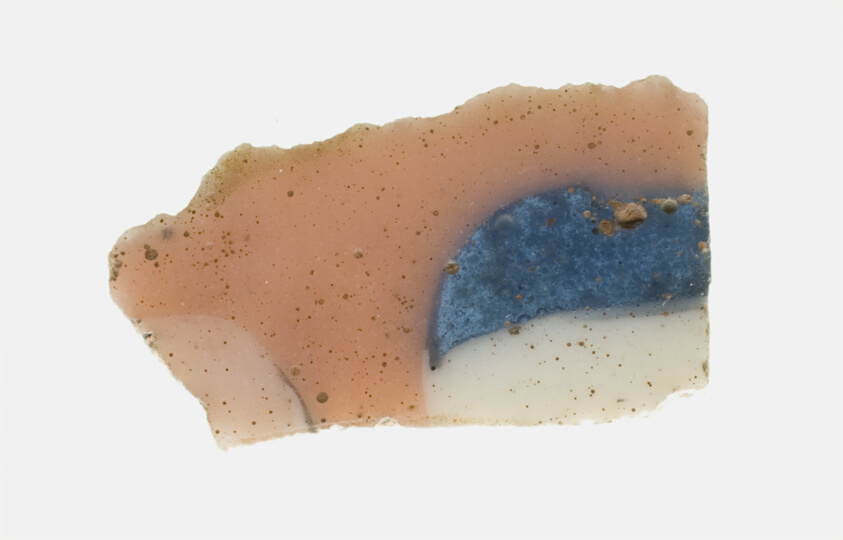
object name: Decorative Arts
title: Fragment of an Inlay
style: roman (ancient, style or period), ancient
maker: Roman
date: 1st century BCE–1st century CE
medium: Glass, mosaic glass technique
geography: Italy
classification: glass; inlay; ancient art; decorative arts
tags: decoration